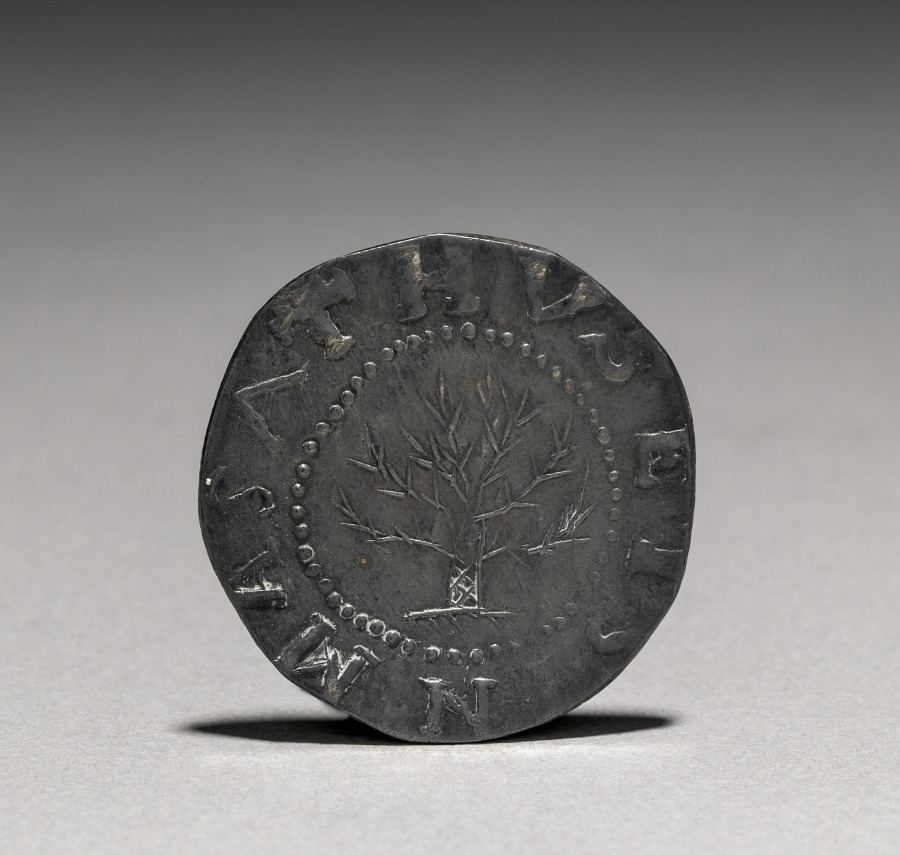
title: Oak Tree Shilling (obverse)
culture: America, Massachusetts, Boston, 17th century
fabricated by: John Hull (American, 1624–1683)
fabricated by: Robert Sanderson (American, 1609–1693)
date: 1652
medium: silver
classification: Coins